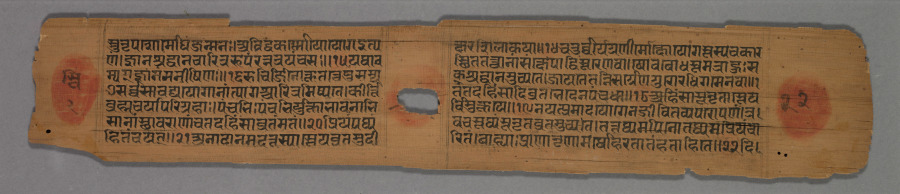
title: Text, folio 22 (verso) from a Yoga-shastra of Hemachandra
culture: Western India, Gujarat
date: c. 1275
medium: Gum tempera and ink on palm leaf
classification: Painting